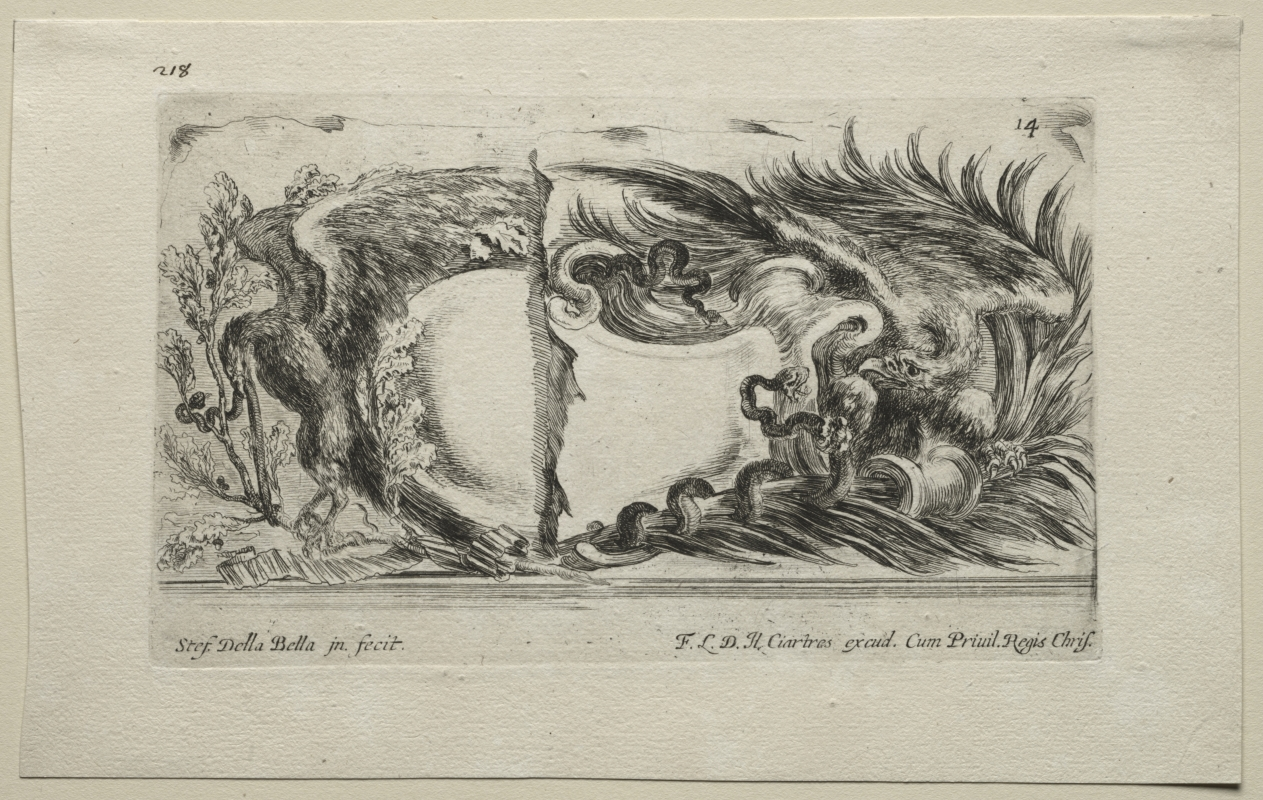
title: Collection of Various Caprices and New Designs of Cartouches and Ornaments: No 14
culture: Italy, 17th century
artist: Stefano Della Bella (Italian, 1610–1664)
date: 1646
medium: etching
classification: Print